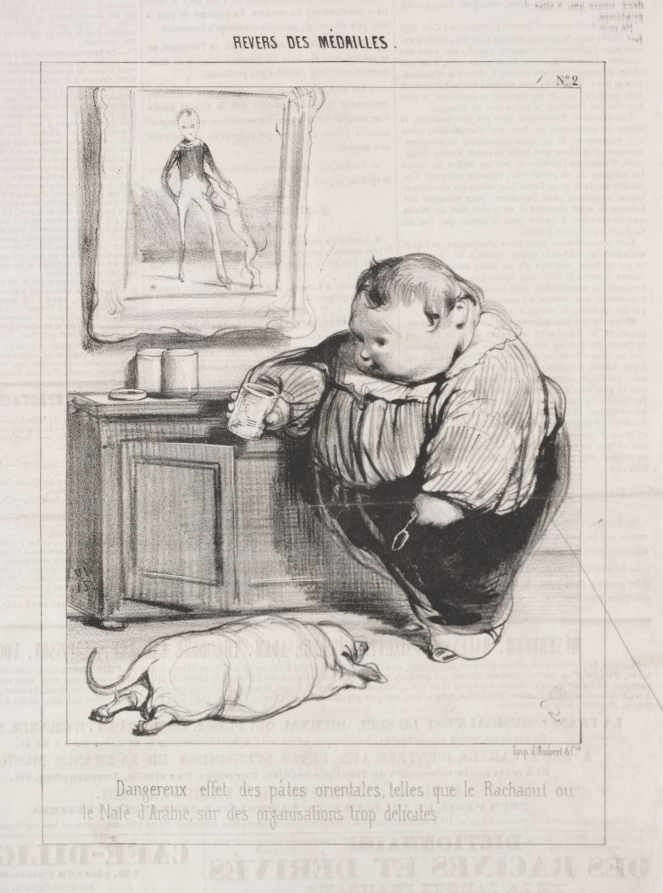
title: Revers des Médailles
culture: France, 19th century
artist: Paul Gavarni (French, 1804–1866)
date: 1842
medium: lithograph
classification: Print